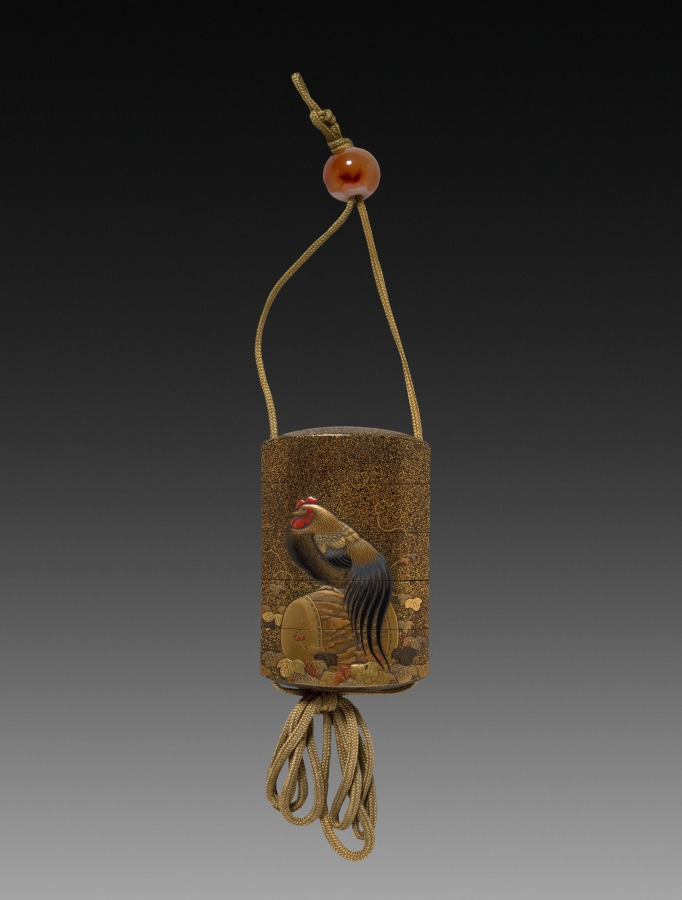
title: Inro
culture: Japan, Edo period (1615–1868)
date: c. 1785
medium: lacquer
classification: Lacquer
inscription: Signature: Toju, aged 78 years